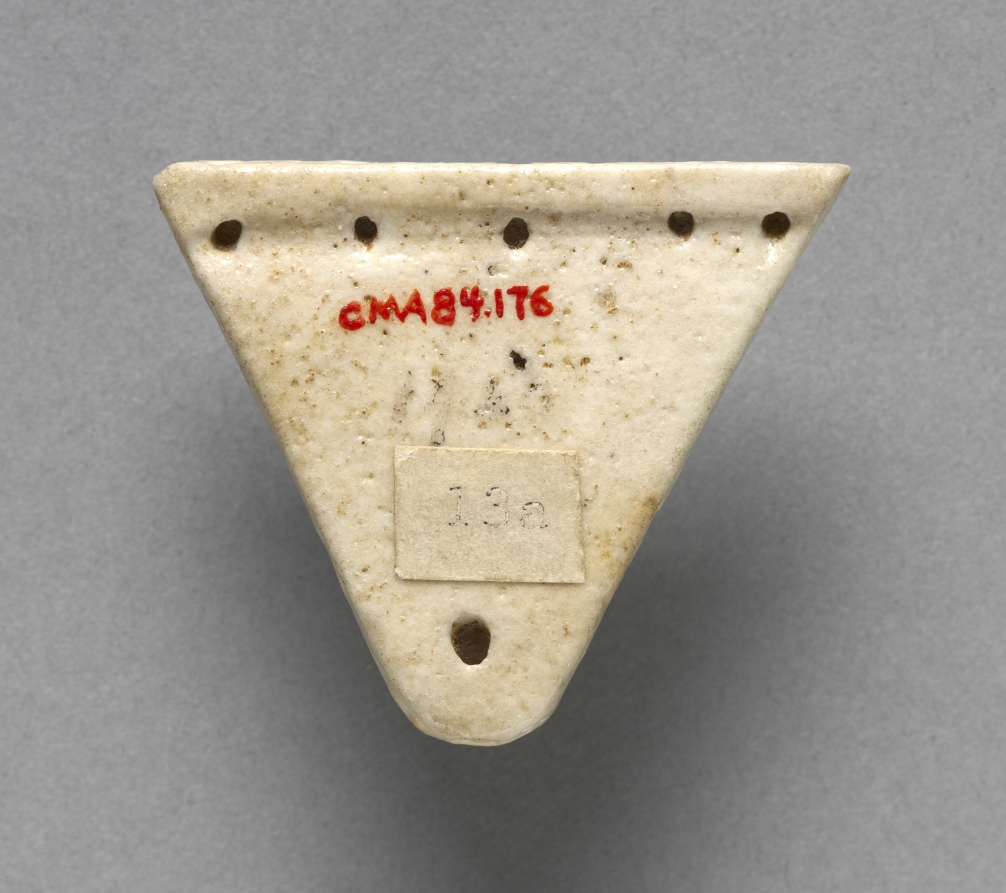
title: Lotus Blossom Necklace Terminal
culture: Egypt, New Kingdom (1540–1069 BCE), Dynasty 18, reign of Amenhotep III (1390–1352 BCE)–reign of Akhenaten (1351–1334 BCE)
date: c. 1391–1337 BCE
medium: polychrome faience with inlaid and painted decoration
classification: Jewelry